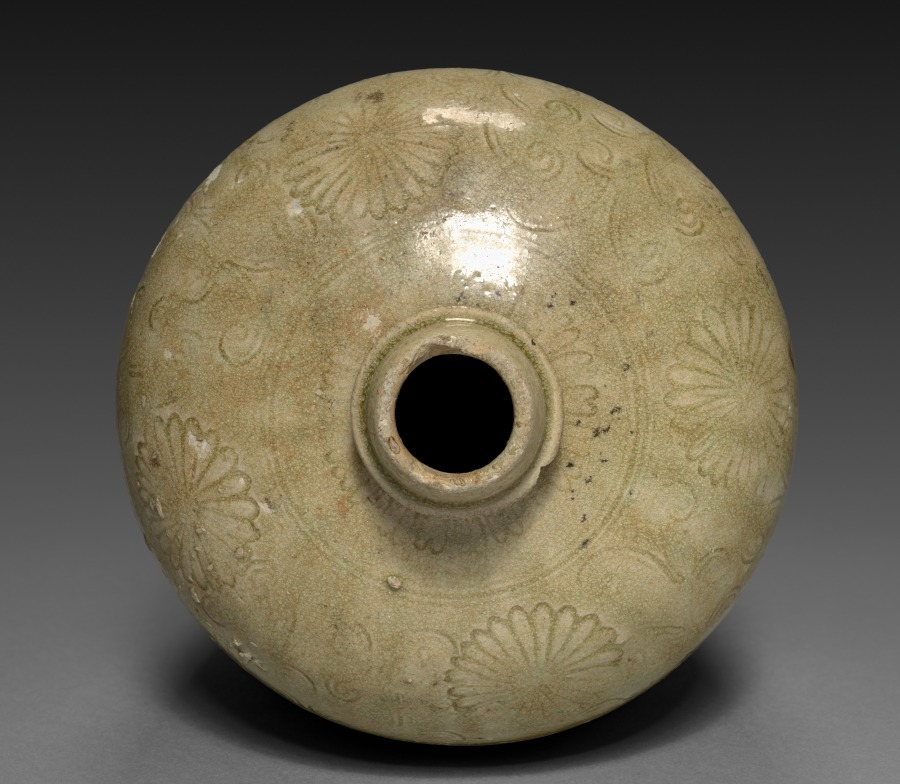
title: Wine Flask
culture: Japan, Kamakura period (1185–1333)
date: c. 1300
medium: Stoneware with ash glaze and underglaze stamped and incised decoration (Seto ware)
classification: Ceramic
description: This wine flask (heishi) was produced in Seto, in present-day Aichi prefecture near the city of Nagoya. Seto ware was made in imitation of Chinese Song dynasty prototypes, and was unique among Japanese ceramics for being glazed at the initial time of its production in the late 1200s. Such wares were later prized for display in tea practice.